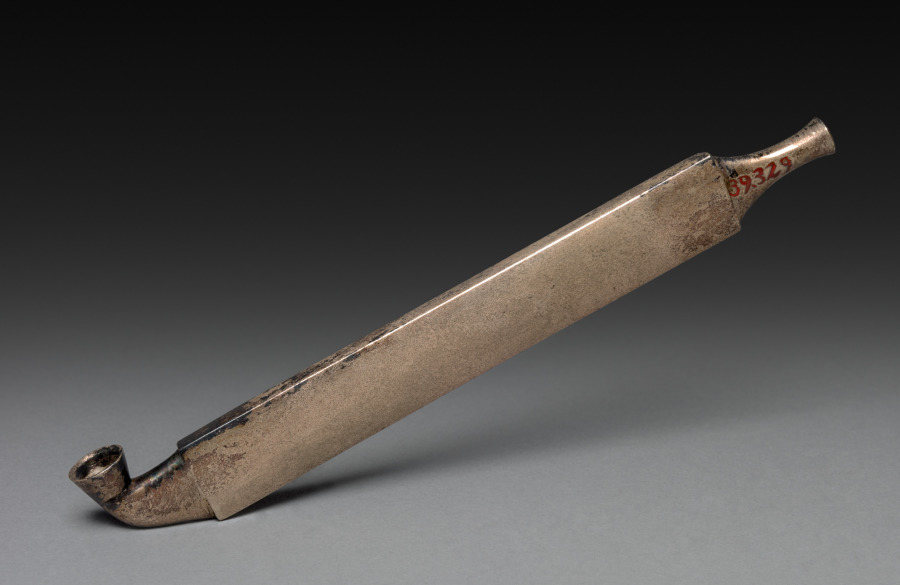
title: Tobacco Pipe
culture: Japan, Edo period (1615–1868)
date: early to mid-1800s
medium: silver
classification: Miscellaneous